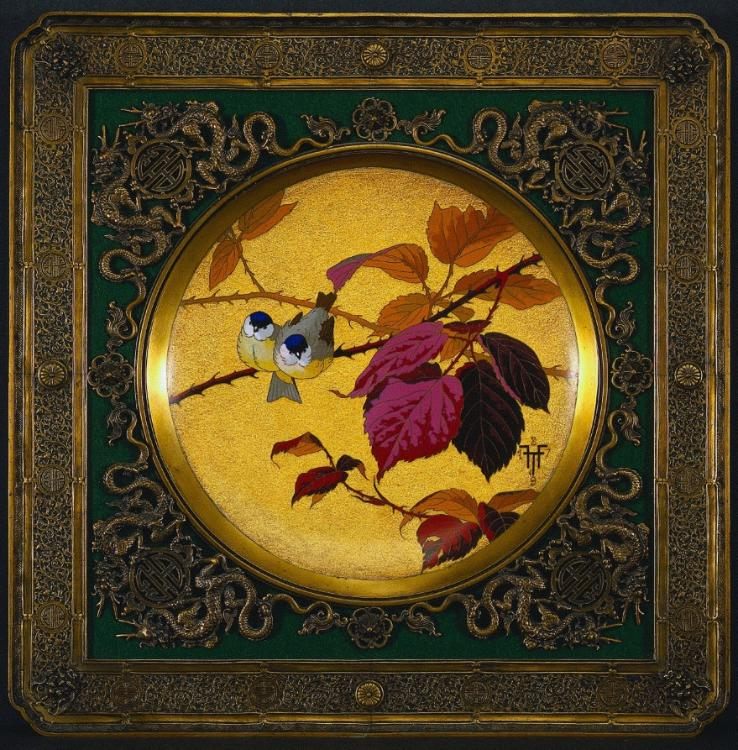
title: Wall Charger Depicting Two Birds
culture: France, 19th century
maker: Edouard Lievre (French, 1829–1886)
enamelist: Fernand Thesmar (French, 1843–1912)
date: 1879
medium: cloisonné and painted enamel mounted in gilt metal frame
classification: Enamel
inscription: on front of the plaque, monogrammed and dated 1879.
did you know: After Japan was opened to the West in the 1860s, Western craftsmen exposed to these new artistic sensibilities popularized the delicate natural and floral motifs that were characteristic of Japanese design.